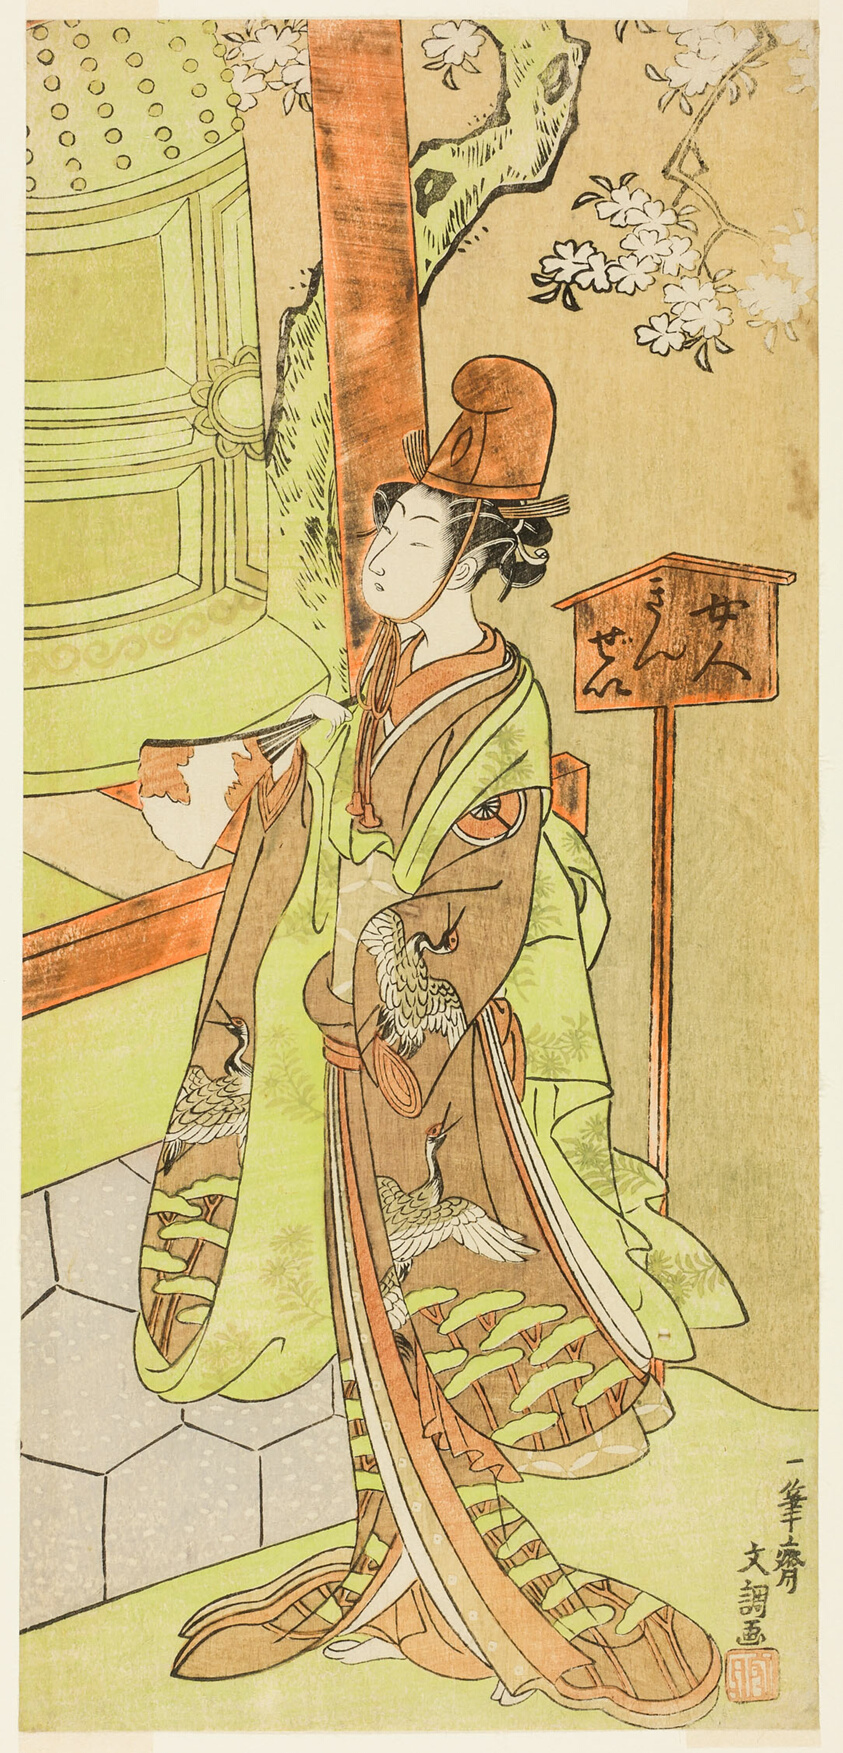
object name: Print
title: The Actor Iwai Hanshiro IV as Kiyohime in the Play Hidakagawa Iriai-zakura, Performed at the Morita Theater in the Ninth Month, 1770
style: Japanese (culture or style)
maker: Ippitsusai Buncho (Japanese, active c. 1755-90)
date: c. 1770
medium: Color woodblock print; hosoban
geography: Japan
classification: woodblock print; print; asian art